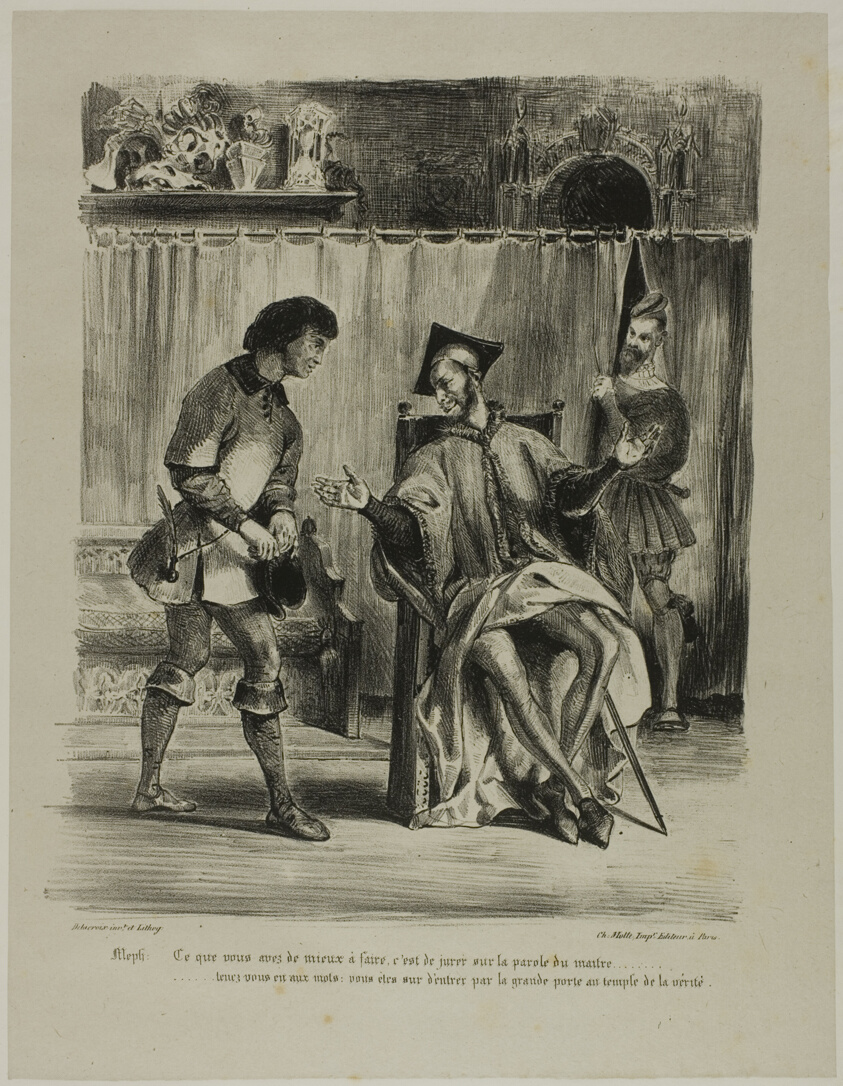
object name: Print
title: Mephistopheles Receiving the Student, from Faust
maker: Eugène Delacroix (French, 1798-1863)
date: 1828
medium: Lithograph in black on light gray China paper laid down on white wove paper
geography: France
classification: lithograph; print; prints and drawing